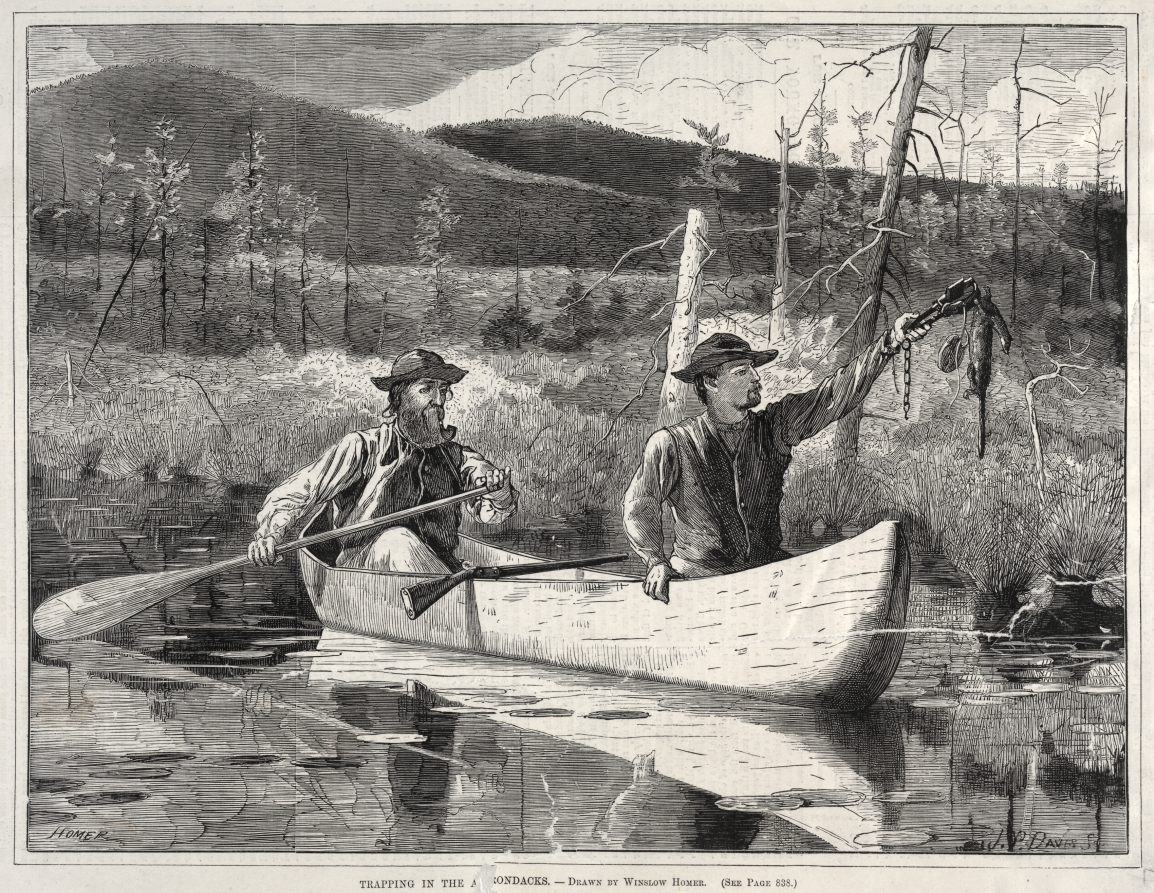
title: Trapping in the Adirondacks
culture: America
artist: Winslow Homer (American, 1836–1910)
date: 1870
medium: wood engraving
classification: Print